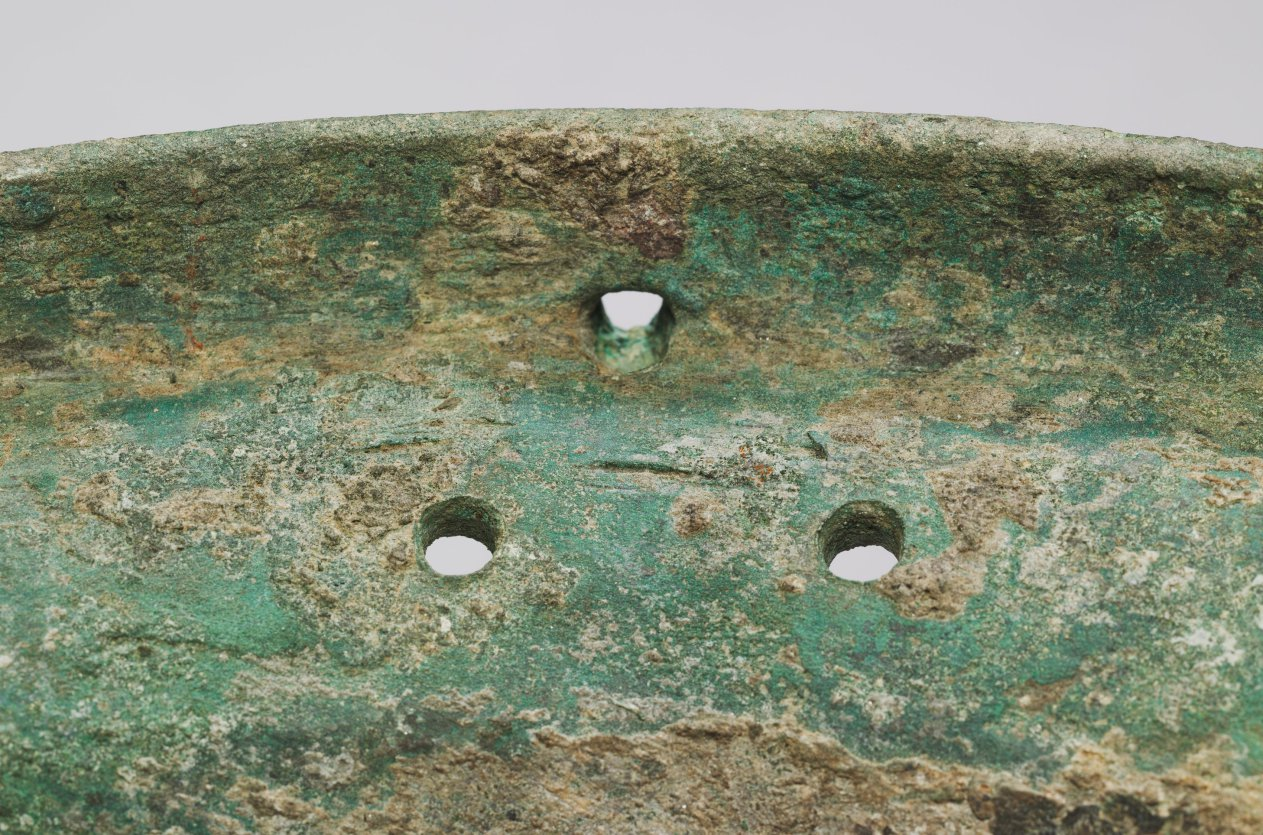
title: Bronze Volute Krater Base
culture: Greece, Laconia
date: late 600s BCE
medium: bronze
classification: Metalwork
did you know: This object supported a large vessel used for mixing wine with water called a krater.